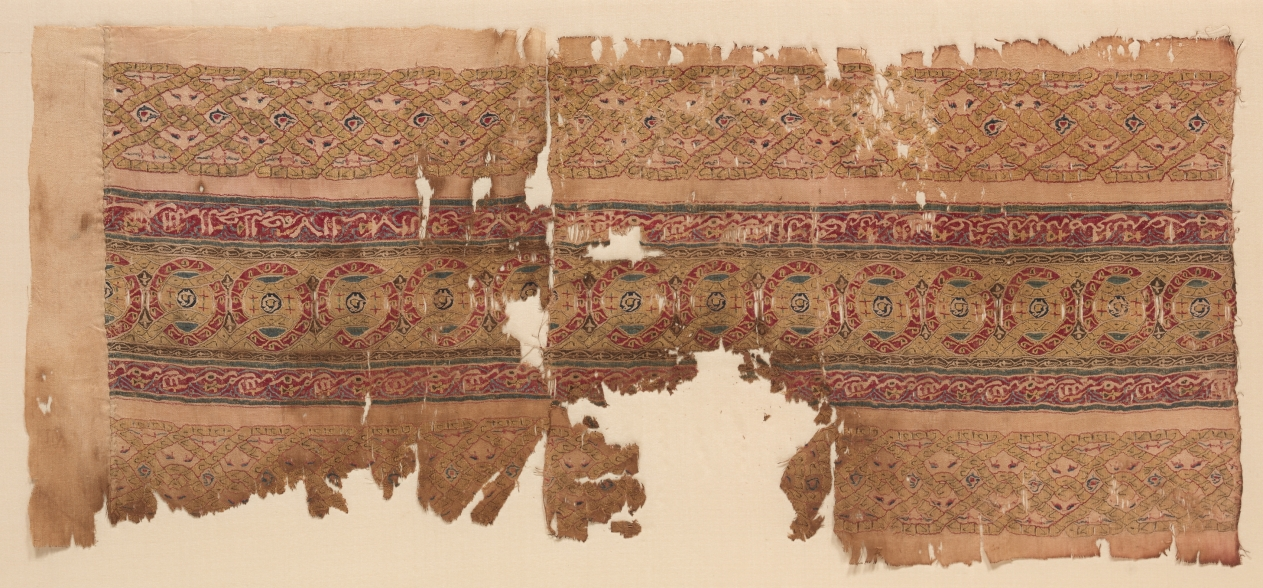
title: Tiraz with guilloche bands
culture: Egypt, Fatimid period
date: 1100s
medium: plain weave with inwoven tapestry weave: linen and silk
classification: Textile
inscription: the top inscription band consists of a repetition over and over of the words: "nasr min Allah (victory is from God.)" The lower inscripton band reads: "Bism Allah al-rahman al-rahim la ilaha illa Allah wahdahu la sharik lahu 'izz min Allah nasr min Allah nasr min Allah barakah Muhammad rasul Allah 'Ali wali Allah sallá Allah 'alayhim[a. . . (In the name of God the merciful, the Compassionate. There is no god but God along; there is no one associated with Him. Glory is from God. Victory is from God. Victory is from God. Blessing. Muhammad is the apostle of God; Ali is the true friend of God, may God bless the[m. . .]."